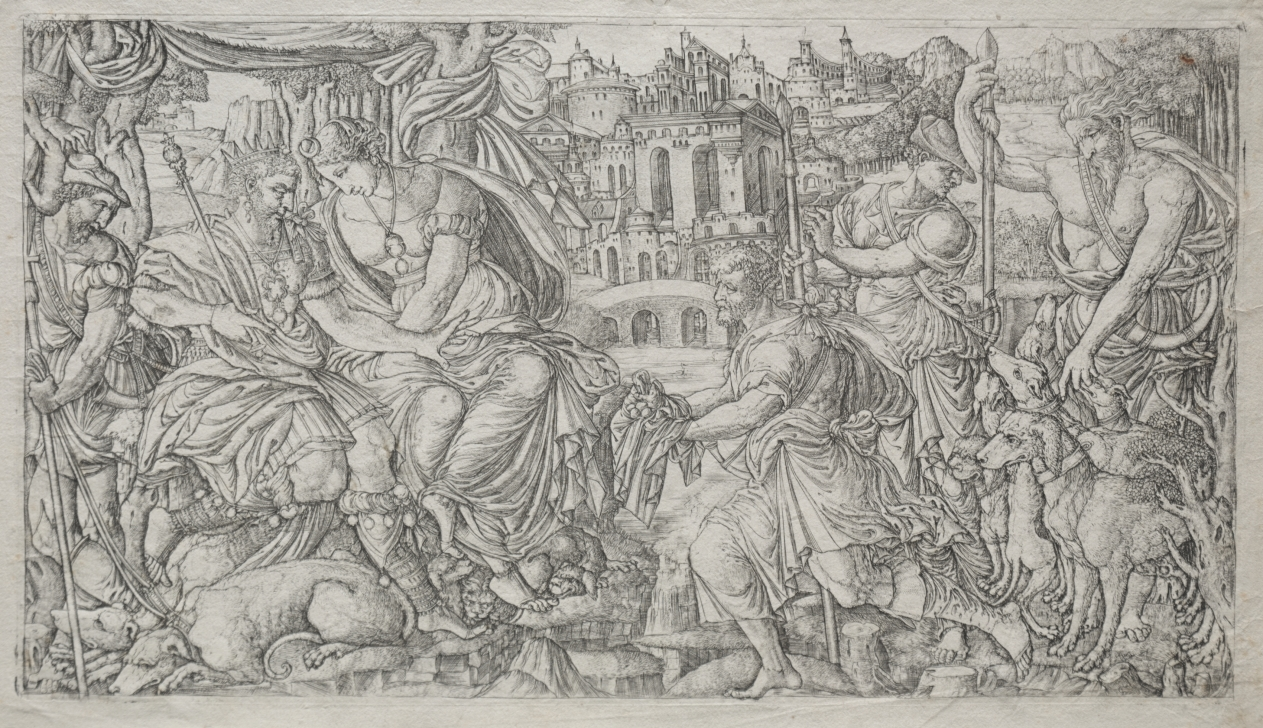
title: Huntsman Presenting a Gift to a King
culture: France, 16th century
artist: Jean Duvet (French, 1485–1561)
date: c. 1547–55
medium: engraving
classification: Print